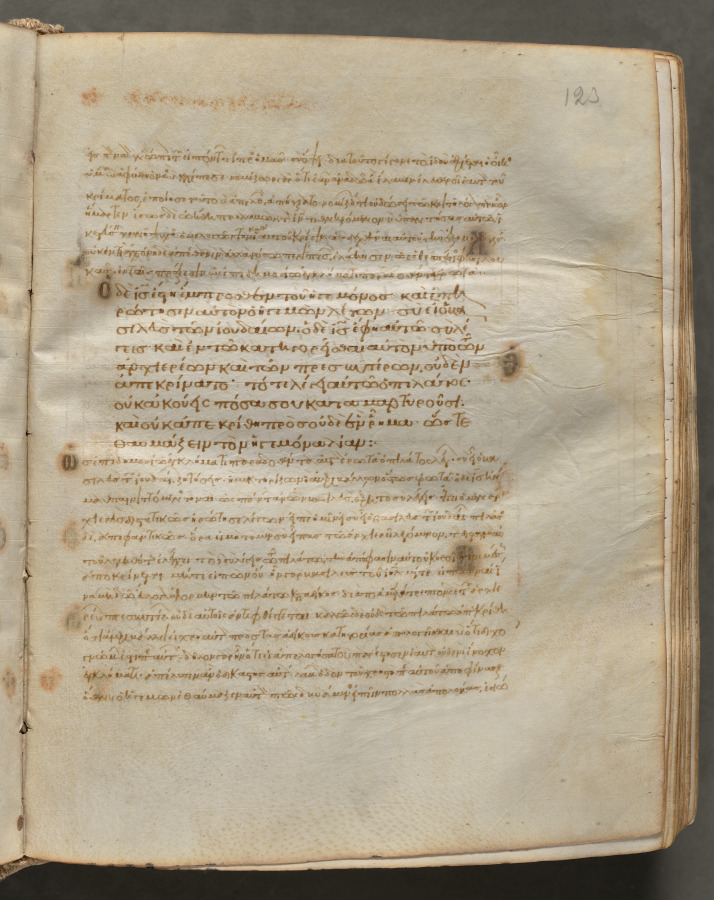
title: Text, folio 123 (recto), from a Gospel Book with Commentaries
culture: Byzantium, Constantinople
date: c. 1000–1100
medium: ink, tempera, and gold on vellum; leather binding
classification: Bound Volume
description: Each of the four gospels in this book opens on a page with brilliantly illuminated borders depicting the author of the text as well as birds-principally peacocks, symbols of the immortality of the soul-and fountains, representing the fountain of life and the salvation of the soul. This volume consists of 428 leaves with texts in Greek. Its level of sophistication suggests that it was probably written and decorated in a monastery in Constantinople.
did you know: Gospel Books were carried in procession through Byzantine churches.